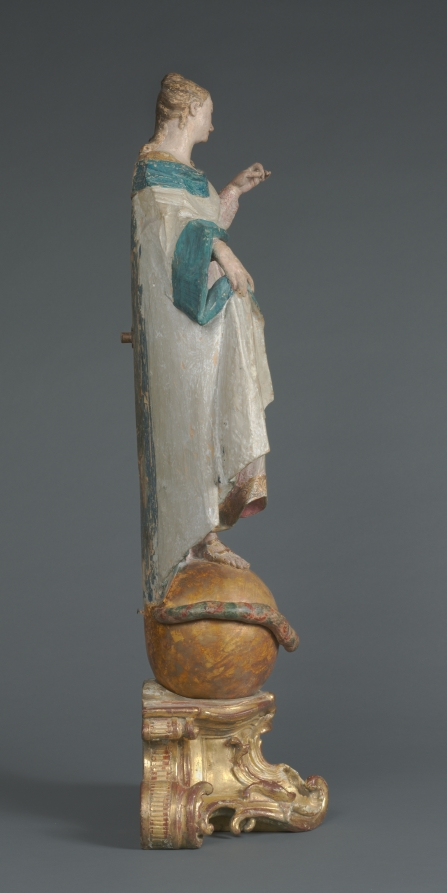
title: The Immaculate Conception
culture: Germany, Munich, 18th century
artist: Ignaz Günther (German, 1725–1775)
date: c. 1770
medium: painted and gilded wood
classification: Sculpture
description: The Christian doctrine of the Immaculate Conception maintains that the Virgin Mary was conceived free from sin, ready to be the pure vessel for Christ’s birth. Depicting such an abstract idea required specific imagery. The moon beneath the Virgin’s feet, for example, comes from the New Testament vision of Saint John the Evangelist (Revelation 12:1) of “a woman clothed with the sun, with the moon under her feet,” while the serpent upon which she treads symbolizes Christ’s triumph over original sin. With his characteristically delicate modeling, elongated proportions, and soft coloring, Ignaz Günther created an archetypal image of innocence on the cusp of womanhood.